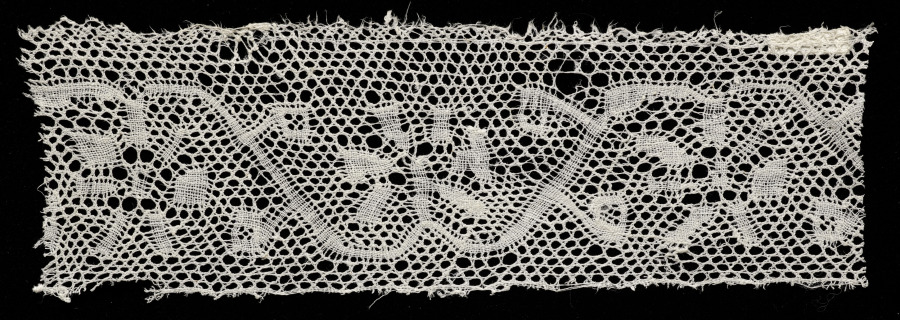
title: Lace Edging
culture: Spain, Cordoba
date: 1700s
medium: Bobbin lace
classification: Lace